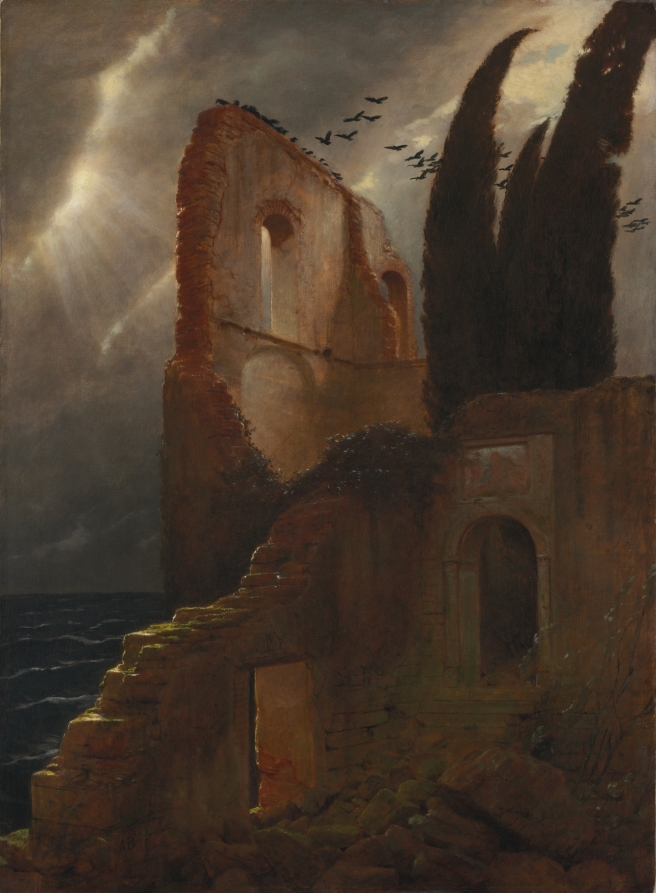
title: Ruin by the Sea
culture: Switzerland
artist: Arnold Böcklin (Swiss, 1827–1901)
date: 1881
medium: oil on fabric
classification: Painting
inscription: Signed lower left: A B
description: The dark, ruined villa in this painting is made especially mysterious by the strange cypress trees tossed by the wind. A nervous green light flickers through the scene. Influenced by German Romantic art of the early 1800s, Böcklin was preoccupied with dreamlike images suggestive of death.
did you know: Who used to live in this crumbling villa on a lonely shore? Böcklin's eerie painting seems to beg the question of the building's history and the circumstances of its ruin. Haunted by the past, this scene also contains premonitions of future peril.